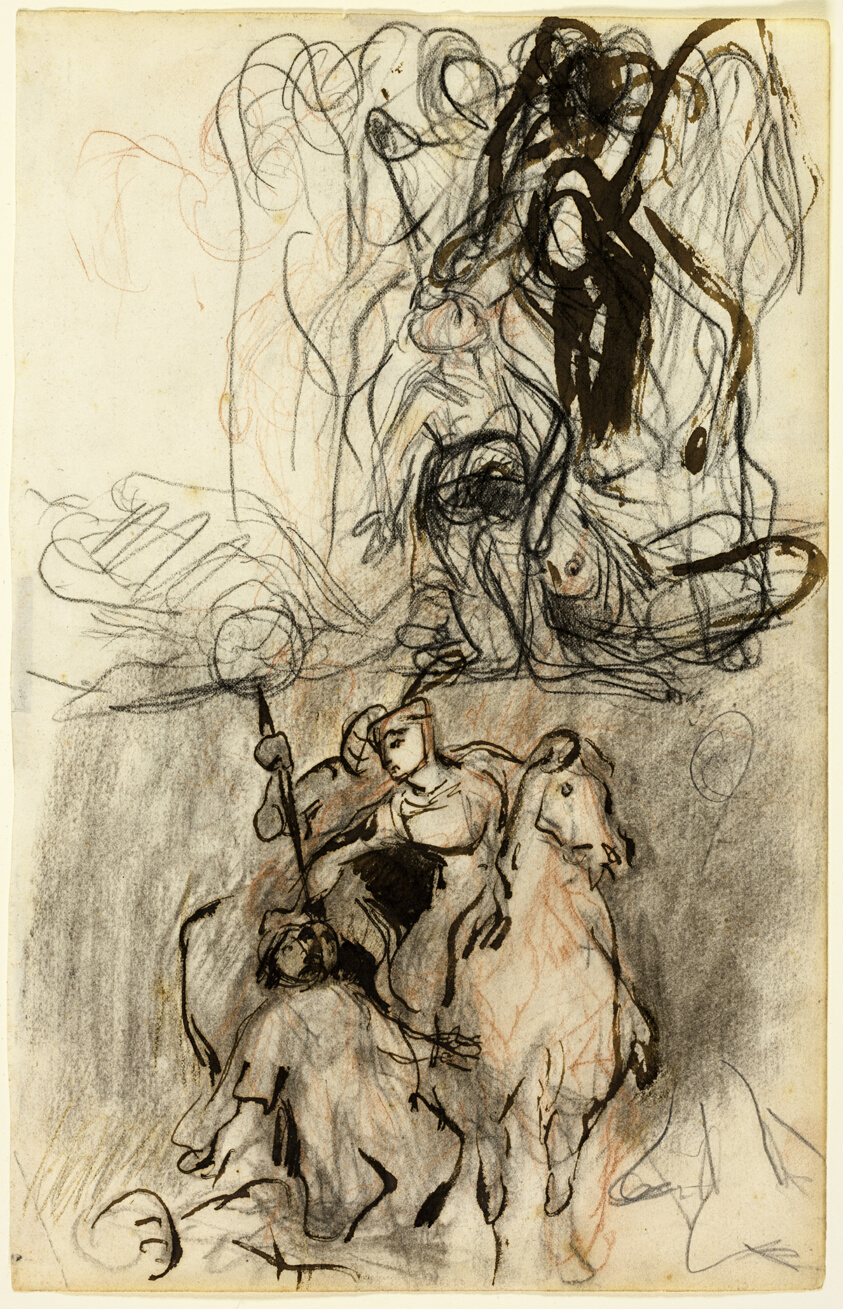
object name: Drawing and Watercolor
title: Two Sketches; Armed Riders and Figure on the Ground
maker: Attributed to Eugène Delacroix; French, 1798-1863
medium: Pen and brown ink, black and red chalk with graphite, on ivory wove paper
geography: France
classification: chalk; drawings (visual works); prints and drawing